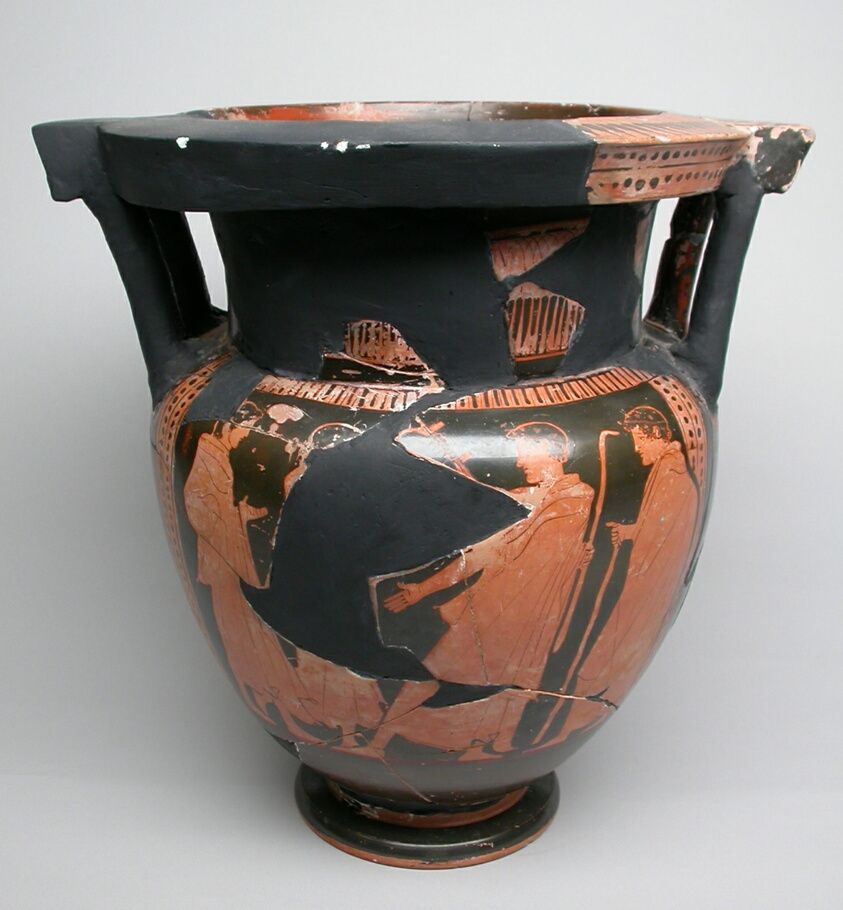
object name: Vessel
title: Column-Krater (Mixing Bowl)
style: red-figure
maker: Attributed to the Painter of London E 489; Greek; Athens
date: about 450 BCE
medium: terracotta, red-figure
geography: Greece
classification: vessel; ceramics; ancient art